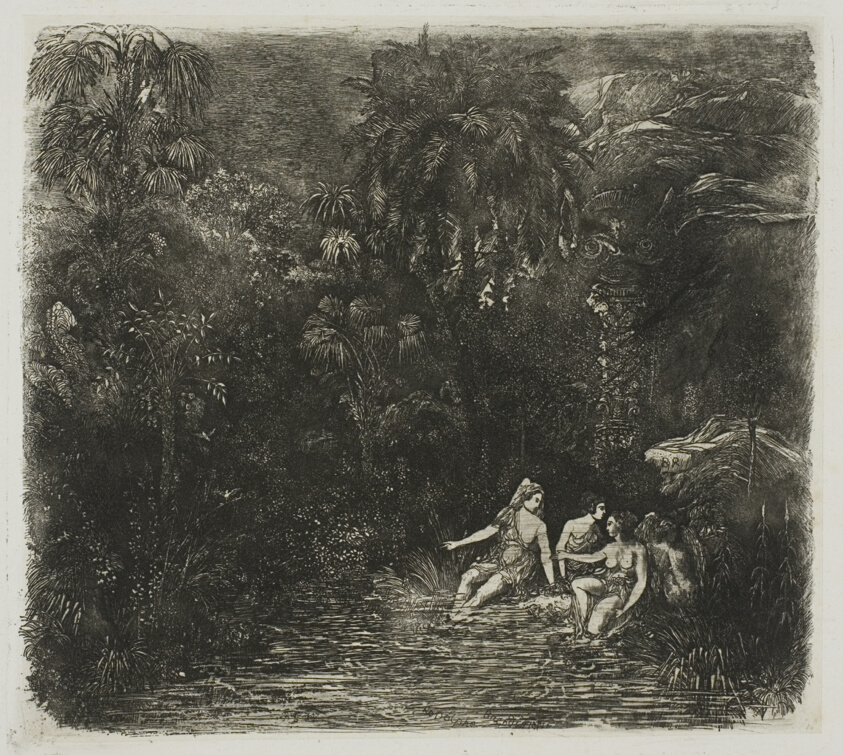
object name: Print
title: The Bathers beneath the Palms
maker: Rodolphe Bresdin (French, 1825-1885)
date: 1871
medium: Etching on ivory China paper laid down on white wove paper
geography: France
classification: etching; print; prints and drawing